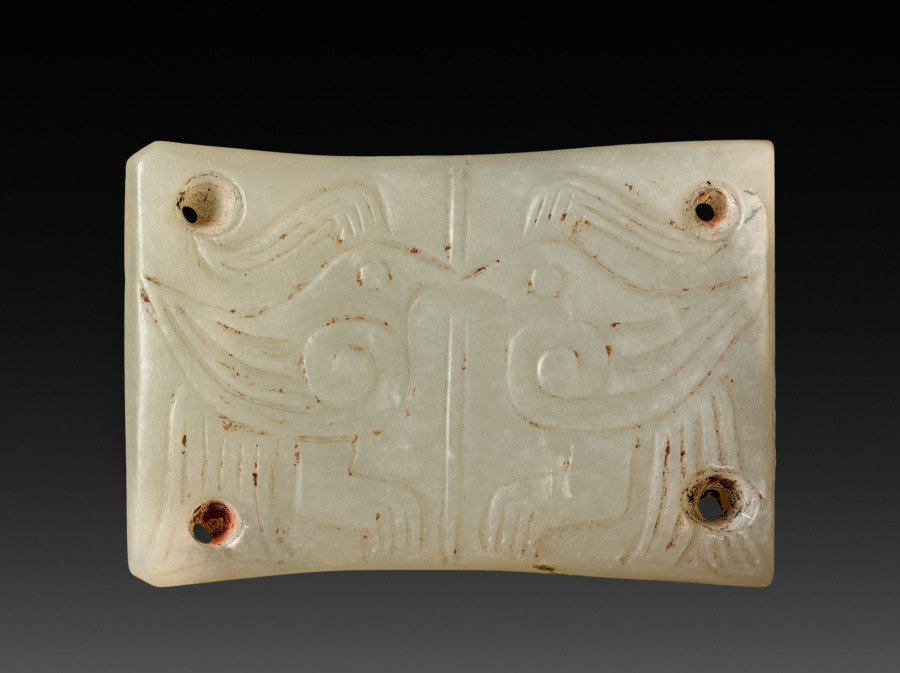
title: Plaque with Paired Birds for Belt or Shroud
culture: China, Western Zhou dynasty (c. 1046–771 BCE)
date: 1100–1000 BCE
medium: jade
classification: Jade